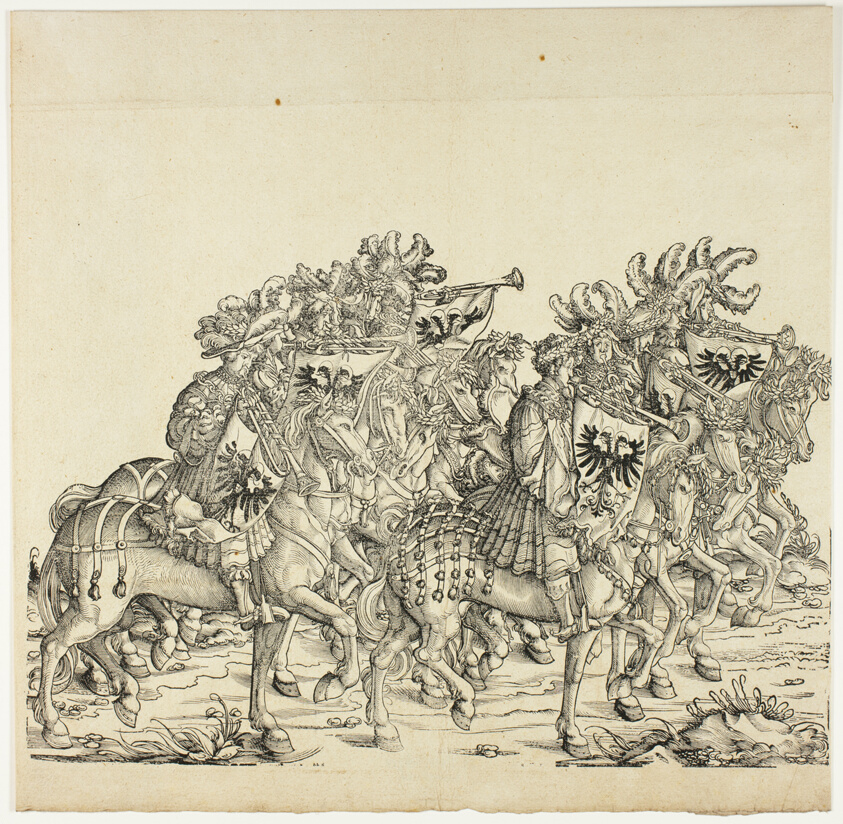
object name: Print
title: Triumph of Maximilian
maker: Hans Burgkmair, the elder (German, 1473-1531)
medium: Woodcut on paper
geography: Germany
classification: print; prints and drawing